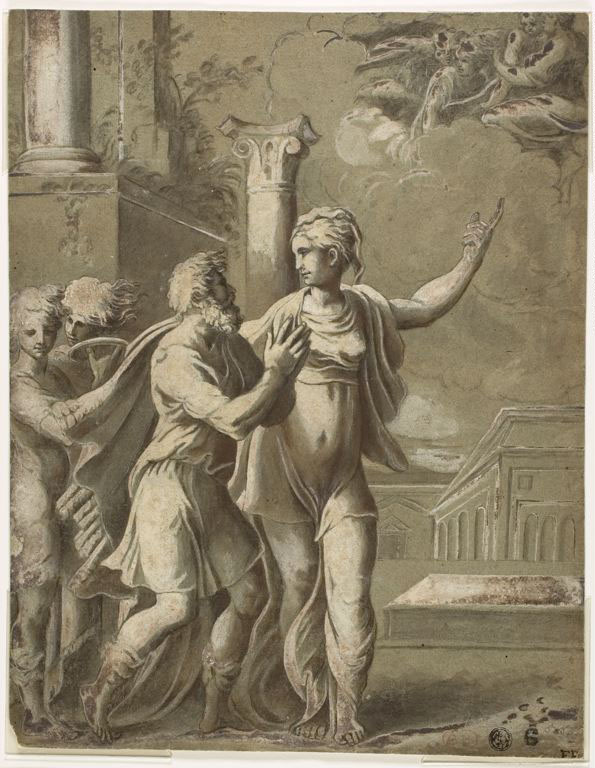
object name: Drawing and Watercolor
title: Augustus and the Tiburtine Sibyl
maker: After Parmigianino; Italian, 1503-1540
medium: Pen and brown ink, with brush and brown wash, heightened with lead white (partly oxidized), on blue-gray laid paper, laid down on ivory laid paper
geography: Italy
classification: ink with wash; drawings (visual works); prints and drawing